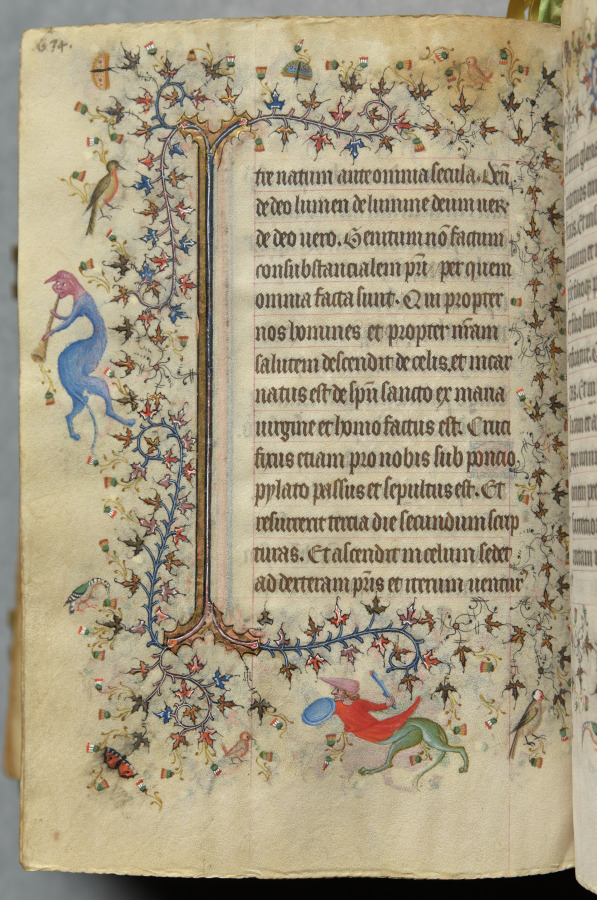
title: Hours of Charles the Noble, King of Navarre (1361-1425), fol. 311v, Text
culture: France, Paris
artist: Master of the Brussels Initials and Associates (French)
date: c. 1405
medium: ink, tempera, and gold on vellum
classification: Bound Volume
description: This precious volume was obviously highly prized by its owner, the French-born King of Navarre, who had his coat of arms painted on no less than twenty folios. Rather than directly commissioning this manuscript from a specific workshop, it seems that Charles the Noble acquired his book of hours -- perhaps ready-made for the luxury market -- while on a trip to Paris in 1404-05. A collaborative effort, six painting styles are evidenced within the pages of this codex, those of two Italians, two Frenchmen, and two Netherlanders. The painter who was responsible for the planning and decoration of the book, and who produced seventeen of the large miniatures, was a Bolognese artist known as the Master of the Brussels Initials. His principal assistant, responsible for most of the borders, was a Florentine who signed his name "Zecho" da Firenze on folio 208 verso.